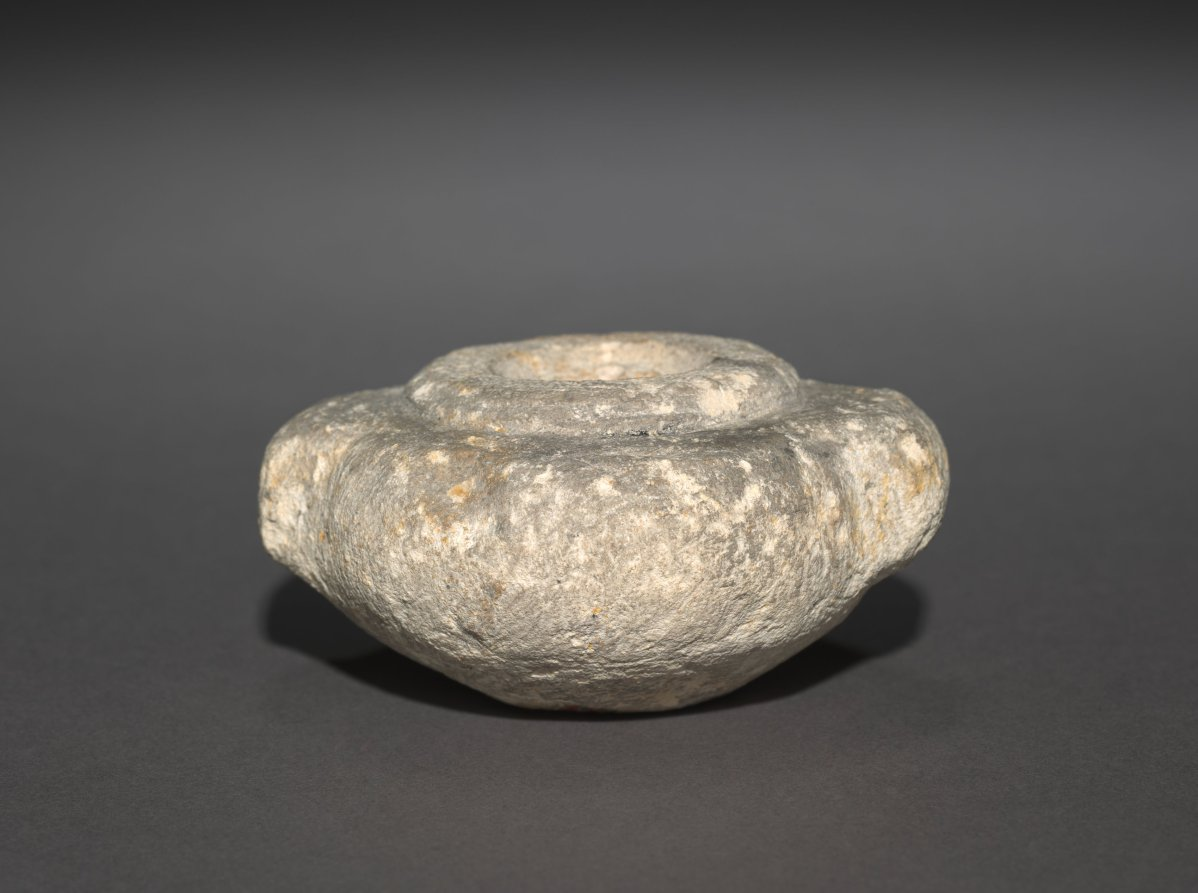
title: Squat Dummy Jar with Lug Handles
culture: Egypt, probably Saqqara, north of the Step Pyramid, excavations of J. E. Quibell, 1910-1911, Early Dynastic (2950–2647 BCE), Dynasties 2–3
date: 2770–2573 BCE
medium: sandstone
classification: Vessels